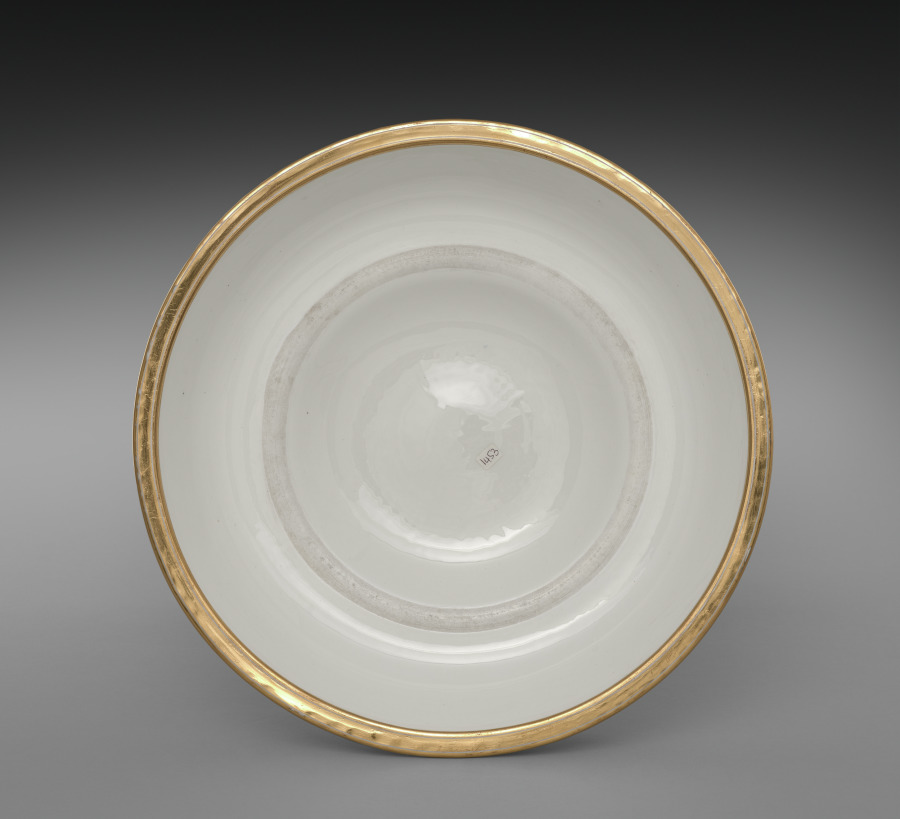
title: Standing Cup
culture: France, Sèvres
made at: Sèvres Porcelain Factory (French, est. 1756)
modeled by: Hyacinthe-Jean Regnier (French, 1803–1870)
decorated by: Francois-Hubert Barbin (French, 1786-)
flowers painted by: Jacques-Nicolas Sinsson (French)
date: 1844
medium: porcelain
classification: Ceramic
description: The official French porcelain factory at Sèvres has always been one of Europe's most important ceramic manufacturers, famous for its decorative pieces as well as more utilitarian wares. This vase in the Renaissance style, its design inspired by 16th-century French examples, is clearly in the tradition of elaborately conceived and decorated pieces intended for use by the French court or as presentation pieces by its monarchs. The latter was the fate of this Covered Cup, acquired in 1846 by Queen Marie-Amélie d'Orleans, the wife of Louis-Philippe, king during the July Monarchy (1830-48). Soon thereafter the vase was presented to a now unknown person. It is one of four pieces of this design made at the Sèvres factory, and the only one known today to have survived.